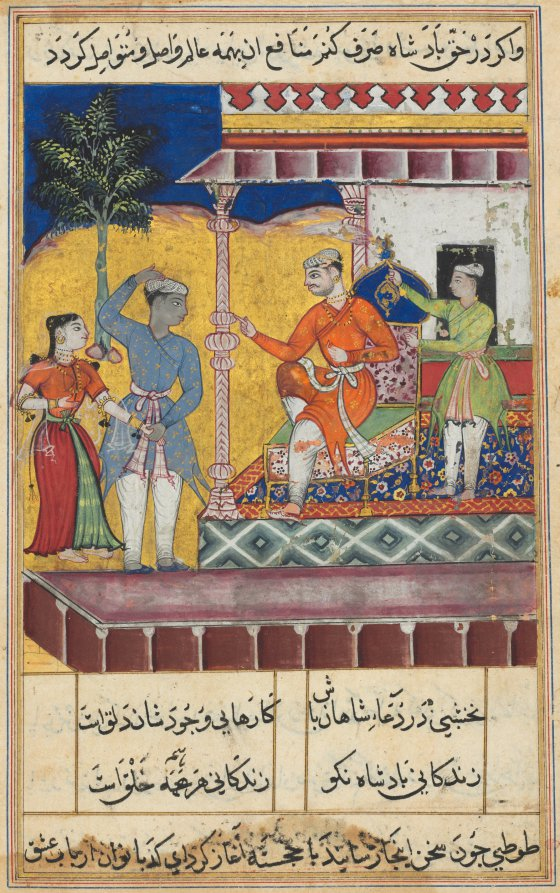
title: The rejuvenated old man and the daughter of the king of the jinns take leave of the King of Kings, from a Tuti-nama (Tales of a Parrot): Seventh Night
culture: Mughal India, court of Akbar (reigned 1556–1605)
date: c. 1560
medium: gum tempera, ink, and gold on paper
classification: Painting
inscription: banwāri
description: The artist who painted the first two scenes rendered the pit as a structure made of bricks. Peering over the edge is a Brahmin, a member of the Hindu priest class, wearing white. In the first painting he holds the bracelets given to him by the jinn princess to pay off his gambling debts; in the second he holds a text. In the pit, the jinn princess has been waiting for 70 years for her beloved to find the courage to pass through the cauldron of boiling oil in order to become purified enough to be with her––a jinn, who is a being of light, like a genie. Hearing of this predicament from the Brahmin, the King of Kings, wearing orange, provided a salve that protects the wearer from the harm of the hot oil, so the old man could safely pass through the boiling cauldron, which restored his youth. The artist Banavari, whose name is inscribed on the margin of the third page, went on to become a prominent artist in Akbar’s atelier. This painting may be the earliest surviving example of his work.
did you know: The old man emerges from the boiling oil eighteen years old and beardless.